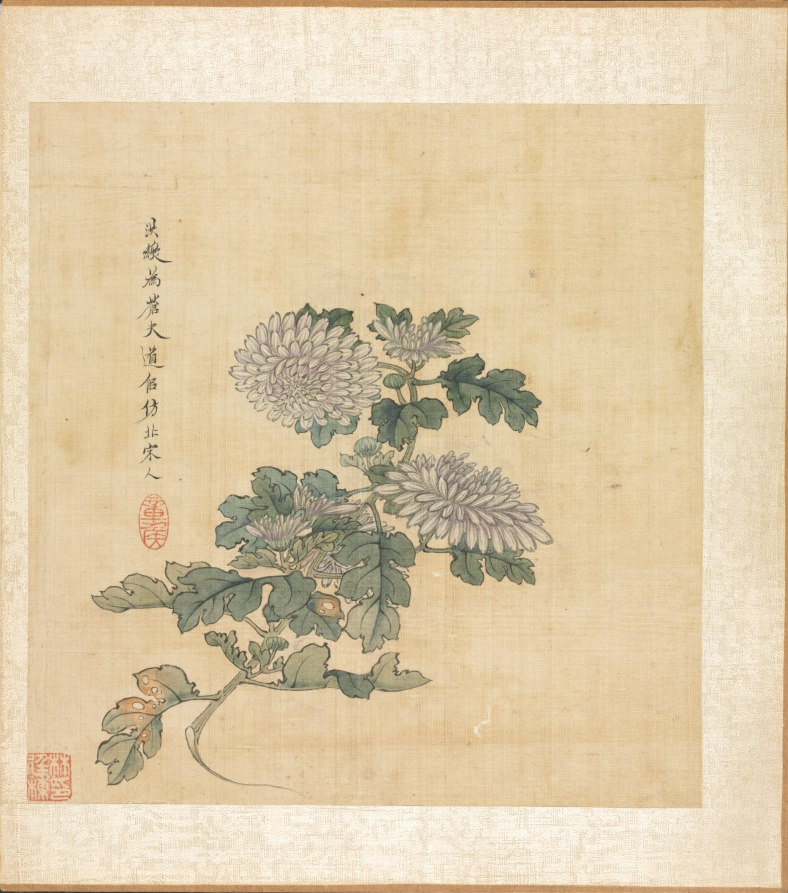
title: Paintings after Ancient Masters: Chrysanthemum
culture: China, Ming dynasty (1368–1644)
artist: Chen Hongshou (Chinese, 1598/99–1652)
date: 1598–1652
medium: Album leaf; ink and color on silk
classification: Painting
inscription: Hongshou painted in imitation of the Northern Song style for Daoist friend, Cangfu. [seal] Zhanghou 章侯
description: Poet Tao Yuanming (365–427 CE) turned down a career as an official in politically turbulent times to return to his home estate, northwest of Mount Lu, to write poetry and enjoy his garden and wine. As he grew chrysanthemums, Tao is associated with this flower. The artist Chen Hongshou, active in Zhejiang province, suffered through the violent transition from the Ming to the Qing dynasty around 1644. This painting of chrysanthemums alludes to the poet who lived a millennium earlier during similarly fraught times.